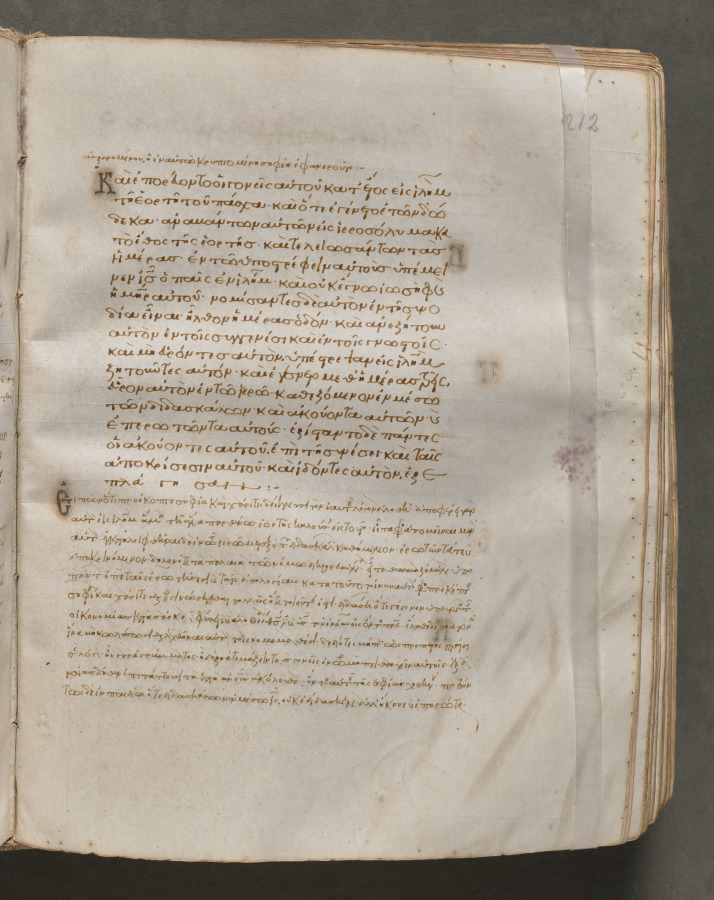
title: Text, folio 212 (recto), from a Gospel Book with Commentaries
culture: Byzantium, Constantinople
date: c. 1000–1100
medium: ink, tempera, and gold on vellum; leather binding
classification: Bound Volume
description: Each of the four gospels in this book opens on a page with brilliantly illuminated borders depicting the author of the text as well as birds-principally peacocks, symbols of the immortality of the soul-and fountains, representing the fountain of life and the salvation of the soul. This volume consists of 428 leaves with texts in Greek. Its level of sophistication suggests that it was probably written and decorated in a monastery in Constantinople.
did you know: Gospel Books were carried in procession through Byzantine churches.